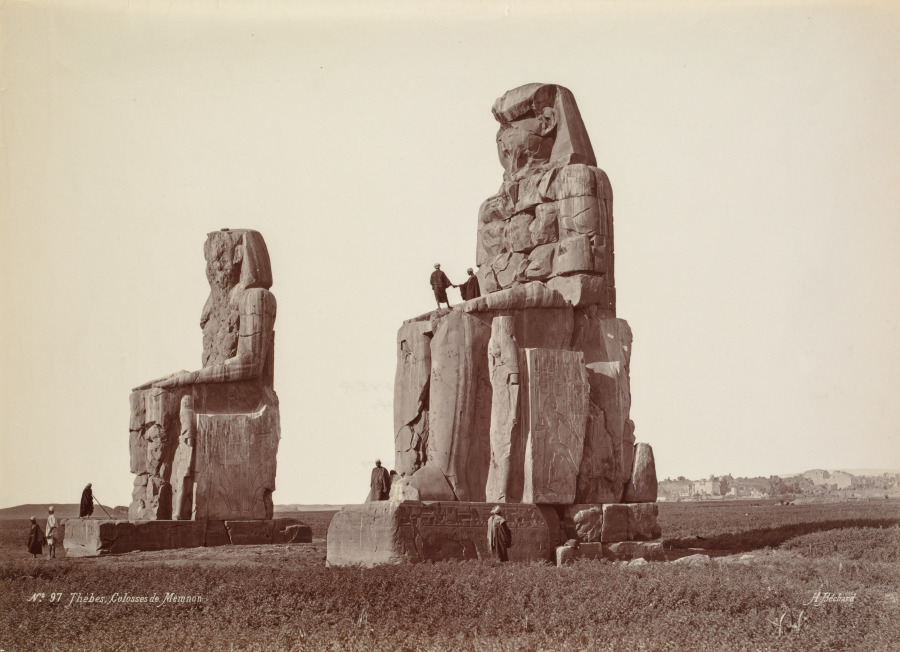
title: Thebes, The Colossi of Memnon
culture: France, 19th century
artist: Henri Béchard (French)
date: 1870s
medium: albumen print from wet collodion negative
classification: Photograph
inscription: Imprinted in white on recto: "No.97 Thebes, Colosses de Memnon H. Bechard" Written in pencil on verso: "No.97/Fiends (?) Ed. CORROYER/Drilitect (?) olly (?) M.H./THEBES/Colosses de Memnon/Li(?) No.97 H.BECHARD"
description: As more photographers shot the same monuments,depictions became formulaic.Numerous photographers produced almost identical images,as demonstrated in these two views of the Colossi of Memnon. Shot from different sides but about the same distance, both images employ an angled view and use Egyptian servants and guides as local color and indexes of scale. Captions and artists’ signatures were often written in reverse on the negatives so that they would automatically become part of each print. Sometimes, as in the Beato image, the artist or his assistant was care less.